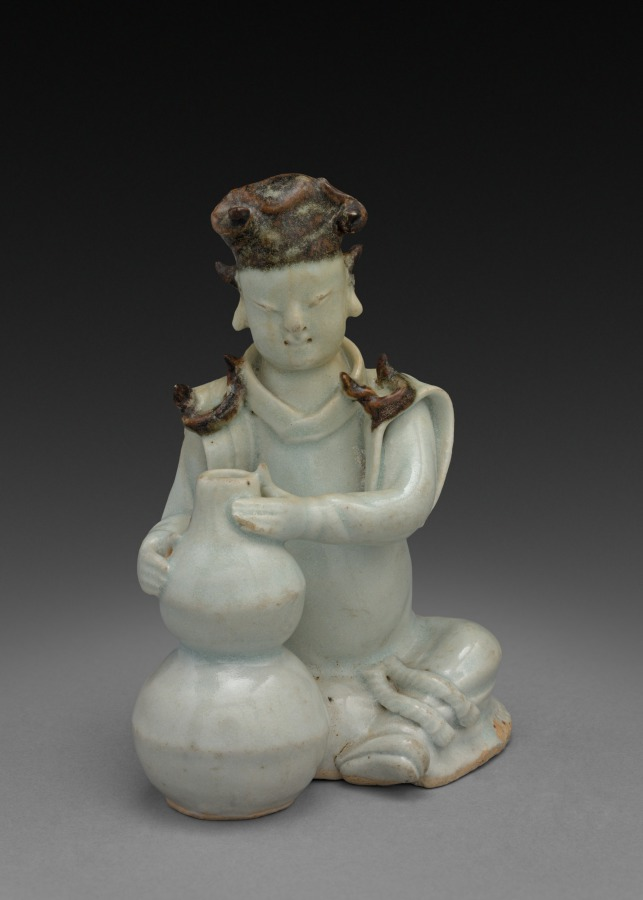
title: Potter Seated with Double Gourd Vase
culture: China, Yuan dynasty (1271-1368) - Ming dynasty (1368-1644)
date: 1300s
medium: Porcelain with underglaze decoration, qingbai ("blue-white") ware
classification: Ceramic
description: Made in South China, this figurine of a potter holding a double-gourd vase was probably once used as a toy. The coarse white porcelain form is covered with thin light greenish-blue, qingbai, glaze. The potter's cap and the coils on his shoulders are painted with blackish-brown ferruginous slip. The glaze stops short of the slightly recessed base, which is burnt a very light pinkish-buff color.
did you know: The double gourd is traditionally regarded as a talisman that protected children against diseases.